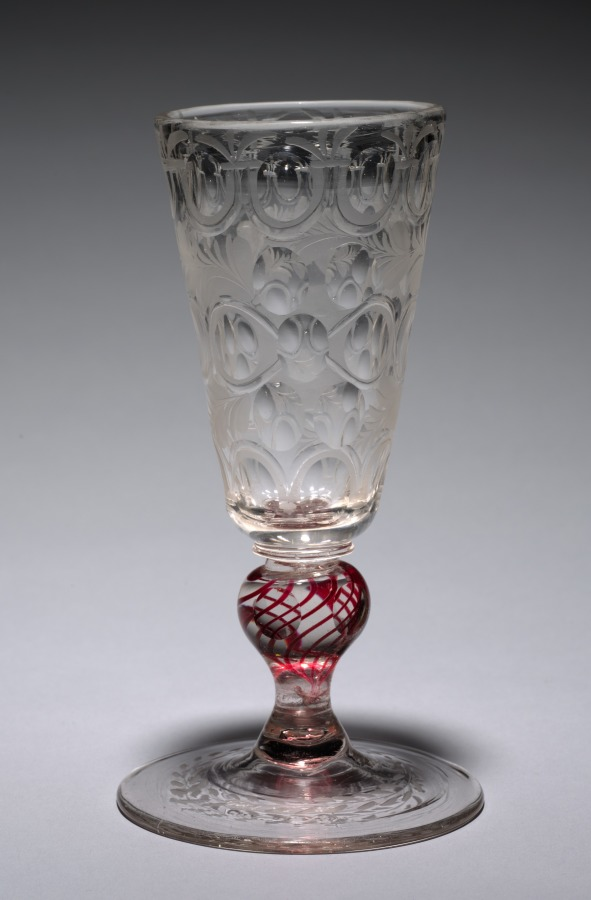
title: Flute-Shaped Drinking Vessel (Pokal)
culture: Bohemia, early 18th century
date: early 1700s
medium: glass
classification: Glass